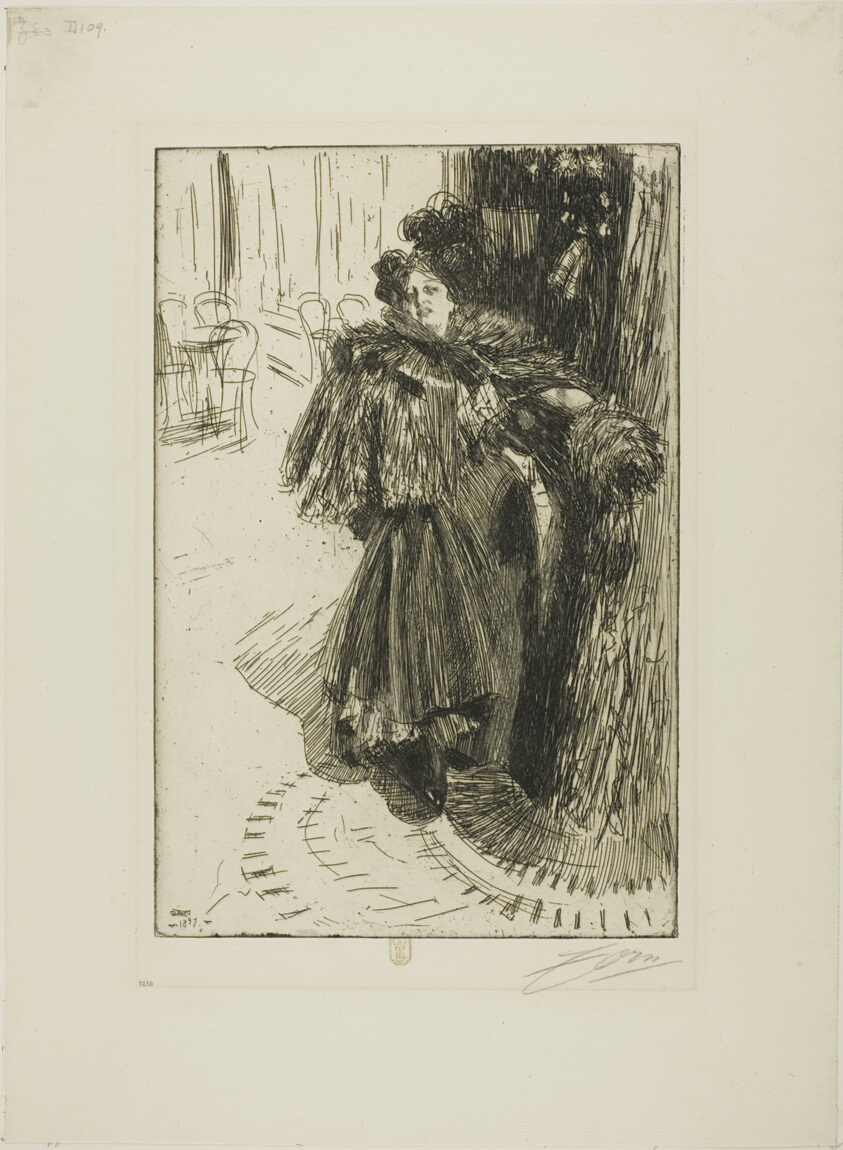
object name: Print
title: Effet de Nuit III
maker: Anders Zorn (Swedish, 1860-1920)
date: 1897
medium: Etching on ivory laid paper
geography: Sweden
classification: etching; print; prints and drawing